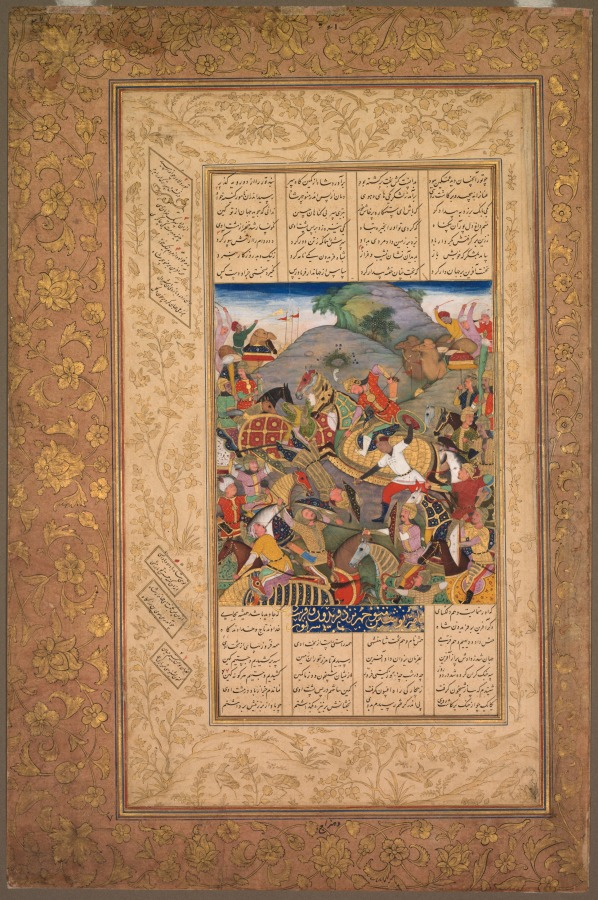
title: Battle between Manuchihr and Tur, from a Shah-nama (Book of Kings) of Firdausi (Persian, c. 934–1020)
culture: Mughal India, court of Jahangir (reigned 1605–27)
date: c. 1610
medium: Gum tempera, ink, and gold on paper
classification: Painting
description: This battle sets the stage for the ages-long enmity in the epic Shah-nama between the people of Iran and Turan—identified as Turkistan, the lands to the east of Iran. The conflict resulted from a bitter family feud that began when a warrior king divided his realm among his three sons; the older two were murderously jealous of the youngest, Iraj, to whom the best lands, those of Iran, were given. In this painting, the warrior in the center is Manuchihr, the grandson of Iraj, avenging his grandfather’s murder by slaying Tur, Iraj’s older brother to whom the less desirable lands of Turan were given. The confusion of battle is skillfully rendered through clustering warriors and warhorses together with varied postures, colors, and patterns.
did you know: Battles were waged to the sound of horns and the beat of drums on camels.